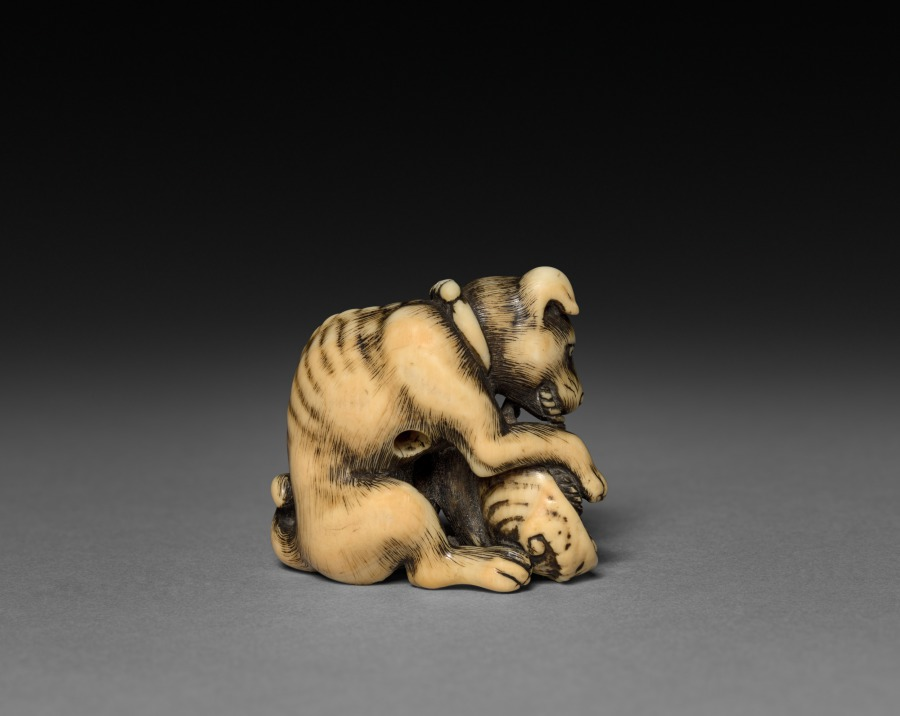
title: Dog with Shell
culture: Japan, Edo period (1615–1868)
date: 1700s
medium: ivory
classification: Netsuke